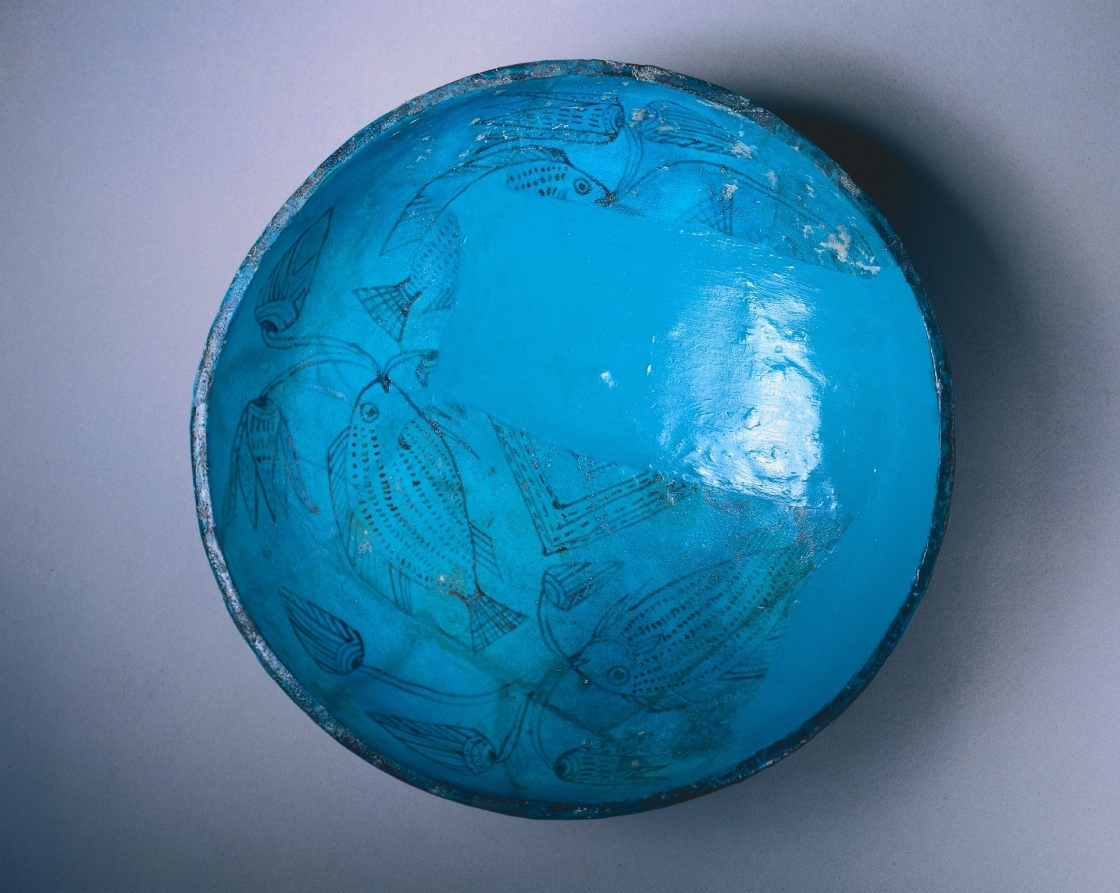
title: Marsh Bowl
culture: Egypt, New Kingdom (1540–1069 BCE), Dynasty 18, reign of Hatshepsut (c. 1479–1458 BCE) or reign of Tuthmosis III (1479–1425 BCE)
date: 1540–1350 BCE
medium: blue faience with purple decoration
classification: Vessels